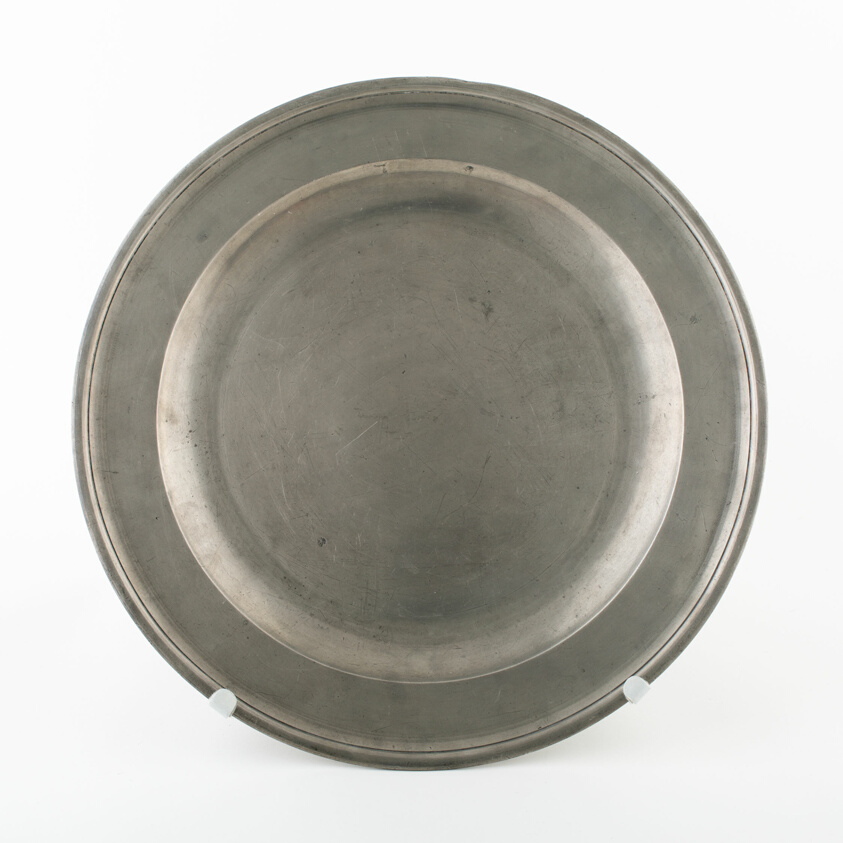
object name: Metalwork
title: Plate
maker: Edgar, Curtis and Co.; English, 1793-1801; Bristol, England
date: 1793/1801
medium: Pewter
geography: London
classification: plate (general, dish); metalwork; pewter; dish (vessel); american decorative arts; american arts